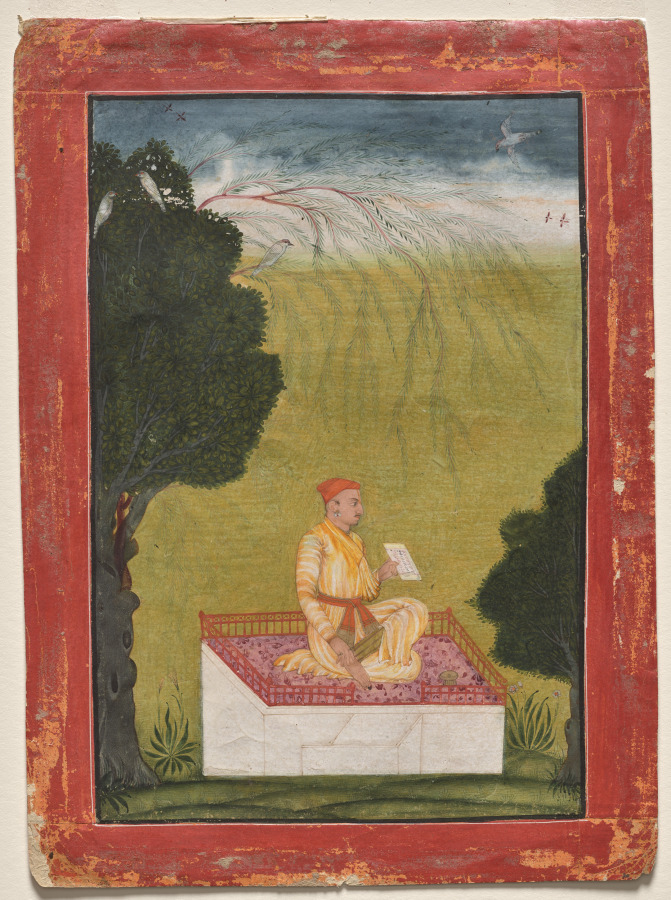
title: Raja Dilip Singh of Guler on a dais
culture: Northern India, Pahari kingdoms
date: c. 1707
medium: Gum tempera and gold on paper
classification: Painting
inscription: verso, in Takri: Shri Dalip Singh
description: Dilip Singh (reigned 1695–1741) holds a manuscript page with alternating lines of red and black ink, which may be a sacred text that announces his devotion to the Hindu god Vishnu, whose mark appears on his forehead. He inaugurated the practice of commissioning paintings and manuscripts for the royal collection at Guler. Some members of a family of artists of Guler had worked in the Mughal imperial workshop in Lahore in present-day Pakistan. They brought a vision of naturalism and delicate refinement evident in the trees, his facial features, Mughal-style belted tunic, and carpet with floral patterns.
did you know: He holds a manuscript, possibly referencing his court chronicle the Diliparanjani, completed in 1707.